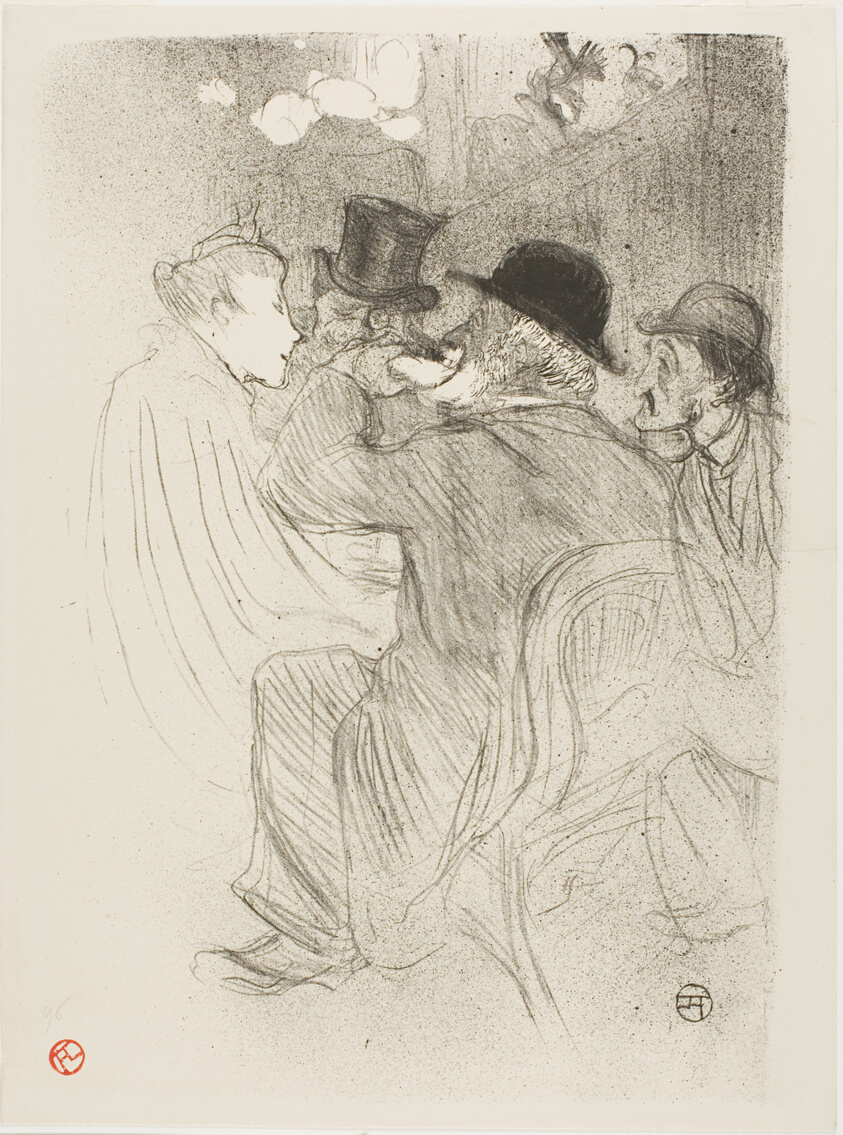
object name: Print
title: At the Moulin Rouge: A Rude! A Real Rude!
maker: Henri de Toulouse-Lautrec (French, 1864-1901)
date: 1893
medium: Lithograph on cream wove paper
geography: France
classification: lithograph; print; prints and drawing